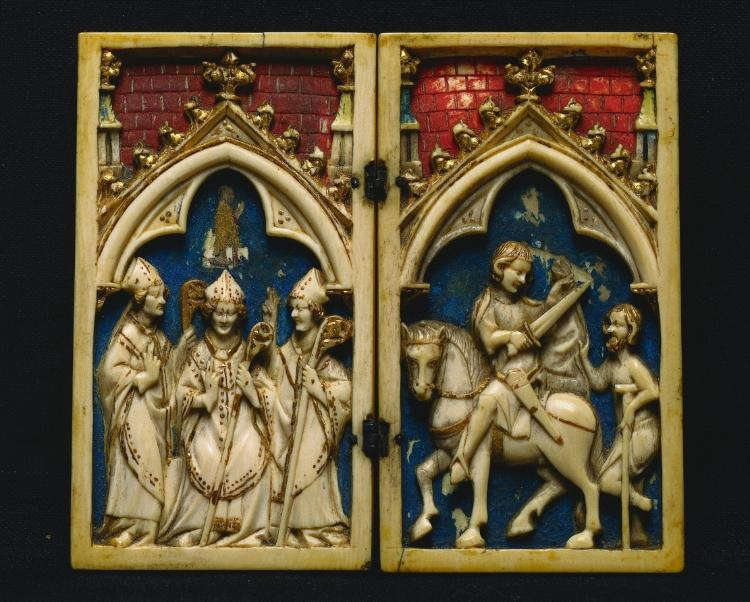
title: Diptych with Scenes from the Life of Saint Martin of Tours: The Consecration of Saint Martin as Bishop (left); Saint Martin Shares his Cloak with a Beggar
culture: Germany, Cologne, 14th century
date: 1340–1350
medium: ivory with polychromy and gilding, original silver hinges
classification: Ivory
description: This beautiful and well-preserved diptych includes its original polychromy, gilding, and silver hinges, though these are no longer connected. With its lapis background, red roof tiles, and gilded details of the figures’ clothing, the appearance is one of luxuriousness. The diptych provides us with a rare and vivid impression of how such devotional ivories were originally decorated in the 1300s.